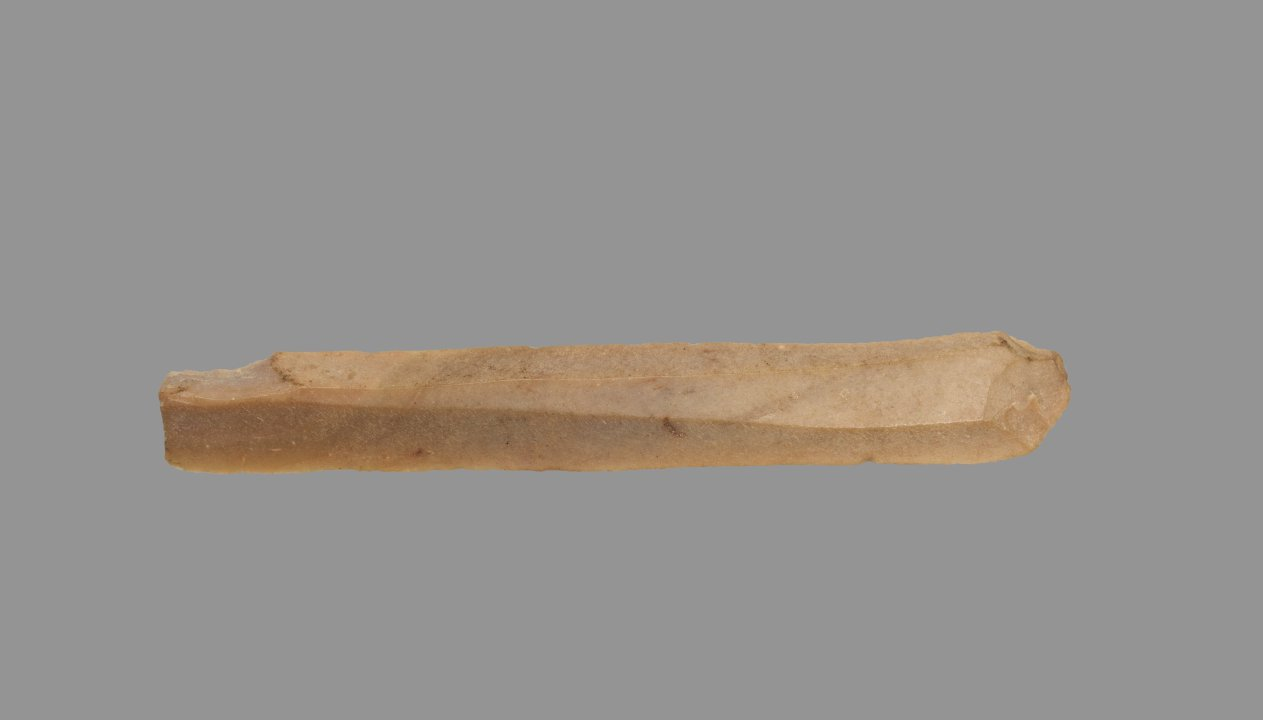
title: Sickle Blade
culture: Egypt, Middle Kingdom (2040–1648 BCE), Dynasty 12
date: 1980–1801 BCE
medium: flint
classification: Implements